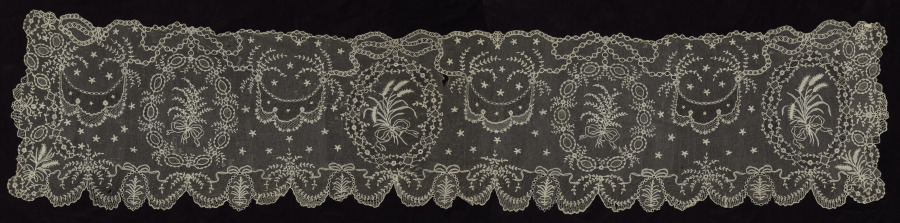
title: Lace Scarf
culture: Belgium, Brussels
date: 1750–99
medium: Bobbin lace (appliqué on net)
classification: Lace